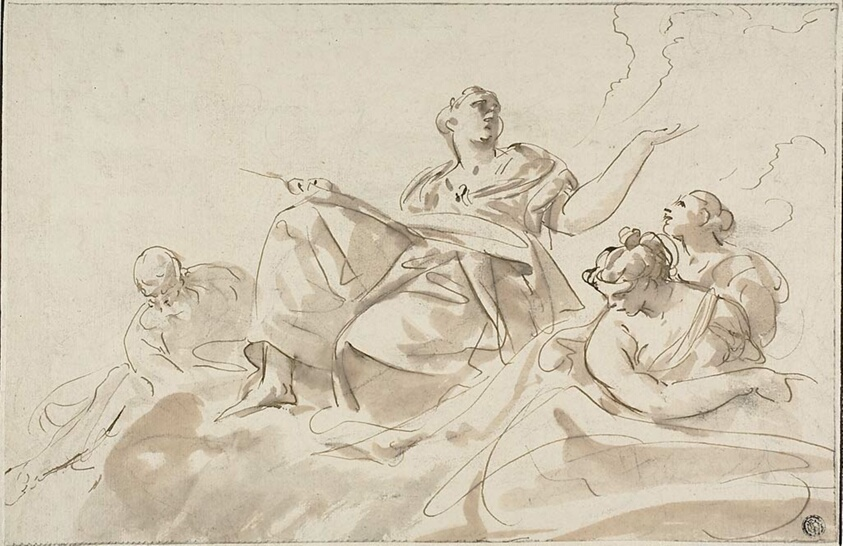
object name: Drawing and Watercolor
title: Allegorical Figures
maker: Possibly Paolo Pagani (Italian, c. 1661-1716); or Corrado Giaquinto (Italian, 1693-1765); or Luca Cambiaso (Italian, 1527-1585); or Fabio Canal (Italian, 1703-1767)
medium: Pen and brown ink, with brush and brown wash, over black chalk on ivory laid paper, laid down on ivory laid paper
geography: Italy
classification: pen and ink drawings; drawings (visual works); prints and drawing